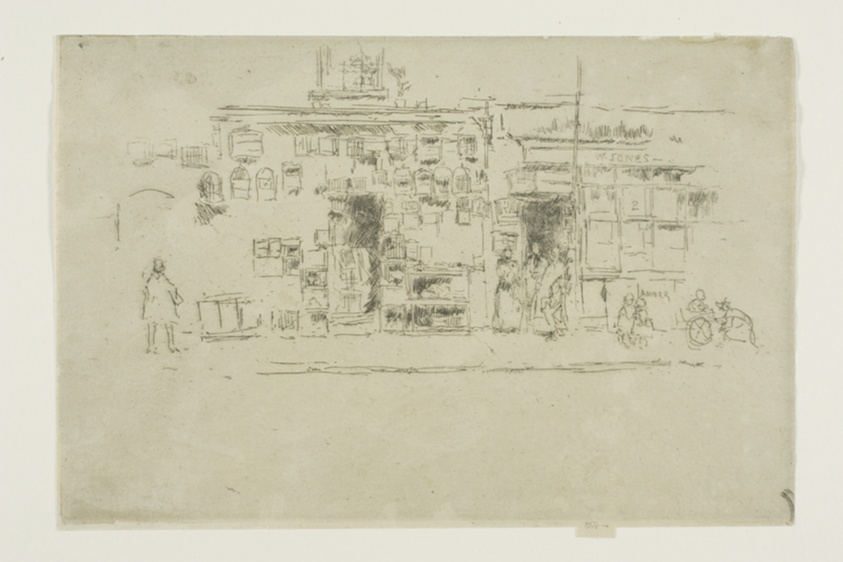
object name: Print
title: Bird-Cages, Chelsea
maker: James McNeill Whistler (American, 1834-1903)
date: 1887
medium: Etching and drypoint with foul biting in black ink on cream laid paper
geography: United States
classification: etching; foul biting; print; prints and drawing; drypoint; paper